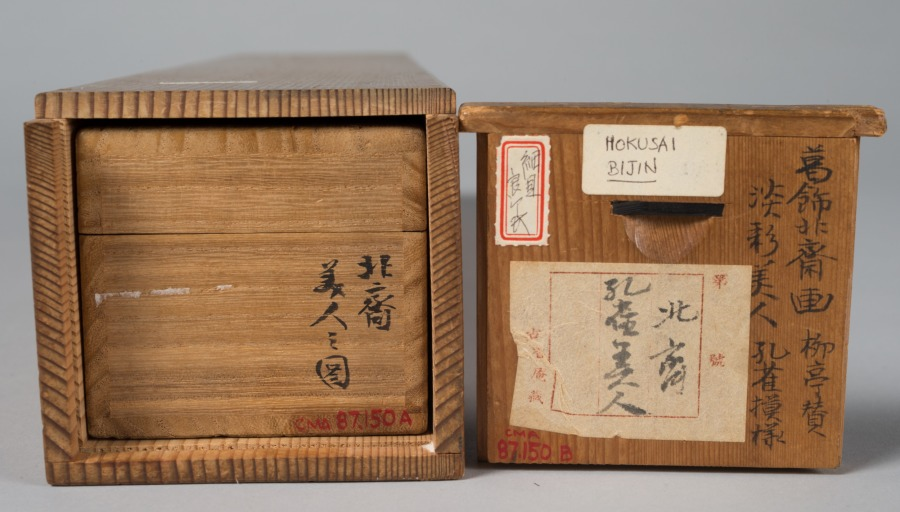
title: Beauty (Bijin)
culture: Japan, Edo period (1615–1868)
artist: Katsushika Hokusai (Japanese, 1760–1849)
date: c. 1775–1849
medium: hanging scroll; ink and color on paper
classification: Painting